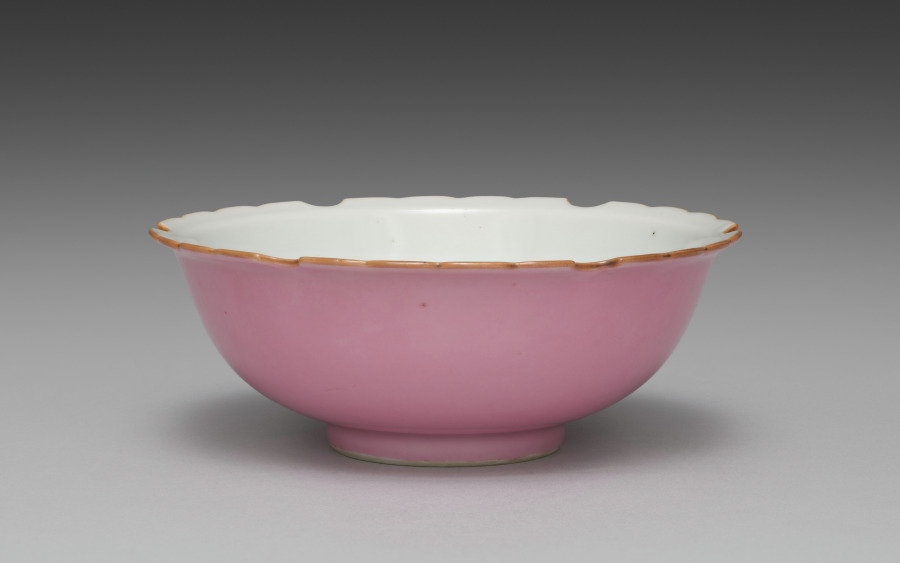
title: Dish from Snow-Flake Side Dishes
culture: Japan, Meiji period (1868–1912)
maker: Seifū Yohei III (Japanese, 1851–1914)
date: 1893–1914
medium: One from a set of six porcelain dishes; porcelain with lobed rims and pink glaze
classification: Ceramic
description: According to the box lid, this set of six side dishes, or mukōzuke, are “snow-flower style” (sekkashiki), having mouths shaped like snowflakes. Their mouths, which have six lobes and scalloped edges, are traced with brown iron oxide at the rim. The outside of each bowl is glazed with a very bright pink over the basin and foot, and the inside is left white. From directly above, one sees a snowflake-like shape, and from the side, they seem to float above a rosy ground.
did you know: The box for this set of dishes has an inscription on the side noting that they were for a person with the family name Nakamoto.